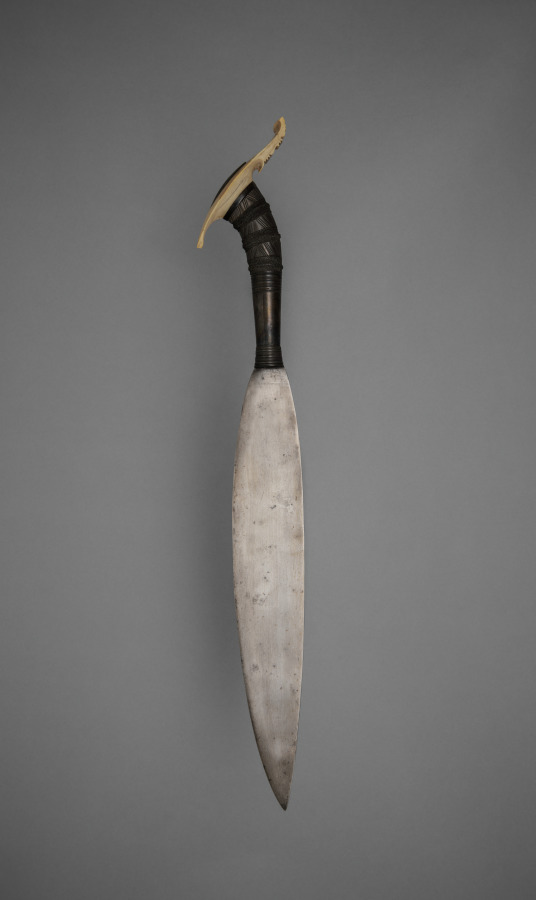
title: Sword (Barong)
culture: Philippines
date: c. 1800s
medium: Blade: steel; handle: silver with braided wire; pommel: ivory with carabao horn inlay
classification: Arms and Armor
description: This sword has a broad, leaf-shaped blade characteristic of the Sulu Archipelago. Its profile suggests it was used for powerful cut-and-slash fighting. The ivory pommel, inlaid with black hardwood, takes the form of a stylized cockatoo (kakatua). This feature, along with the finely worked horn grip, indicates that this was a prestige weapon owned by a member of the warrior nobility.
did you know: The grip is made of carabao horn, a draft animal similar to the water buffalo.